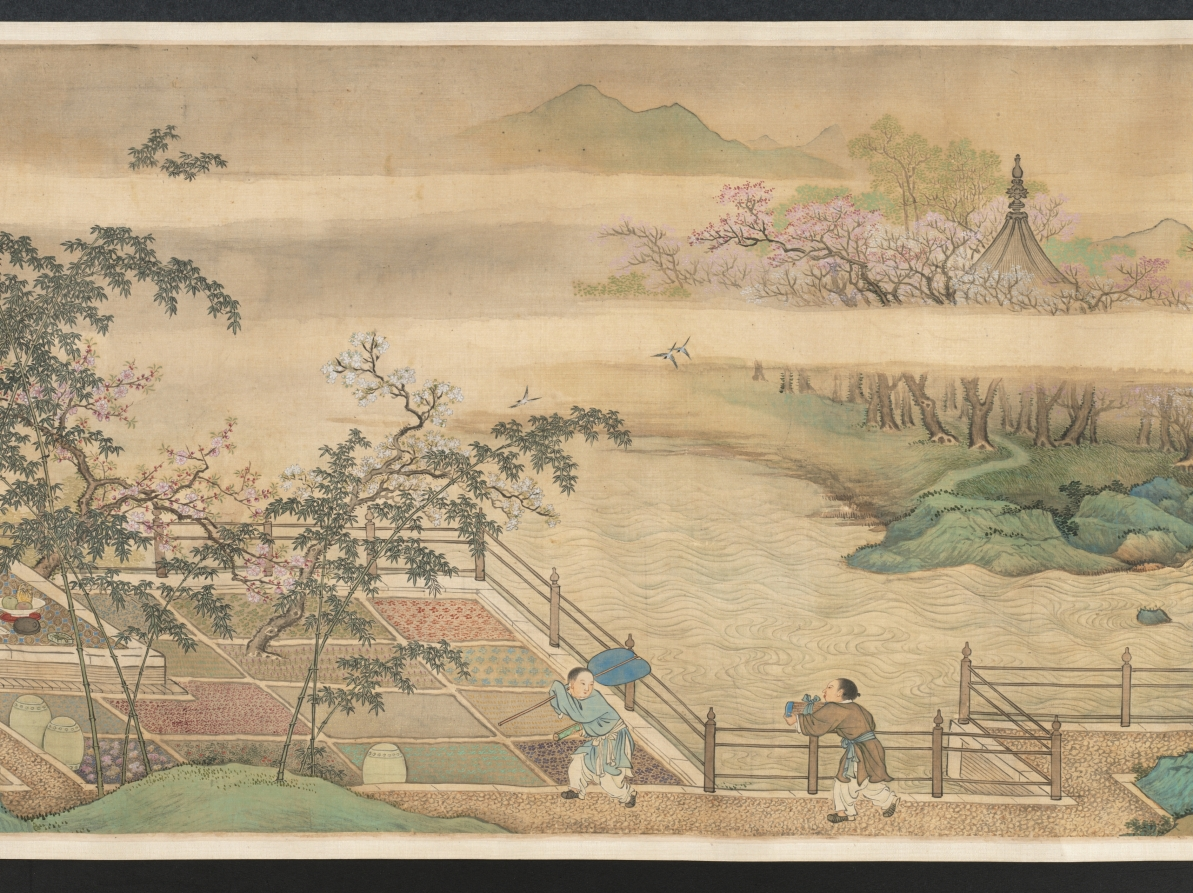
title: Cleansing Medicinal Herbs in the Stream on a Spring Day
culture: China, Qing dynasty (1644-1911)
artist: Yu Zhiding (Chinese, 1647–c. 1716)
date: 1703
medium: Handscroll; ink and color on silk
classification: Painting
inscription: Title by Chen Yixi.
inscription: 姑射仙人冰雪膚，新詩傳唱滿通都。/ 極知遲暮難為別，更展春泉洗藥圖。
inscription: Colophon by Chen Tingjing 陳廷敬 (1639–1712). Colophon by Wang Hongxu 王鴻緒 (1645–1723), dated 1707. Colophon by Song Luo 宋犖 (1634–1714). Colophon by Liu Yan 劉巗. Colophon by Jing Xikui 涇西夔. Colophon by Liu Yan 劉巗. Colophon by Cao Yin 曹寅. Colophon by Wang Shihong 汪士鋐. Colophon by Wang Shidan 王式丹 (1645–1718), dated 1712. Colophon by Shi Shenyi 史申義 (1661–1712), dated 1712. Colophon by Yin Yuqing 殷餘慶, dated 1712.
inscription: Colophon by Chen Shixia 陳時夏, dated 1729.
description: A famous portraitist, Yu Zhiding here depicts the likeness of Shi Shenyi 史申義 (1661–1712), an official and poet. Master Shi, a sickly man, was deeply interested in medicinal science. The opening section of the scroll features a boy washing a fungus in fresh spring water, a basket of medicinal herbs by his side. Other servants carry a fan, a bundle of scrolls, and a cup of tea or hot wine. Master Shi sits in a bamboo grove, surrounded by fields of herbs. Returning swallows, pink peach blossoms, and blooming magnolia indicate spring, whereas the fungus conveys wishes for long life. The spring theme may express the artist’s wish for his friend’s recovery.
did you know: In the pavilion are some of Shi Shenyi’s scholarly accoutrements: a stack of books, an antique zun 尊 (wine vessel), a brush holder, an ink stone, and a small chime.